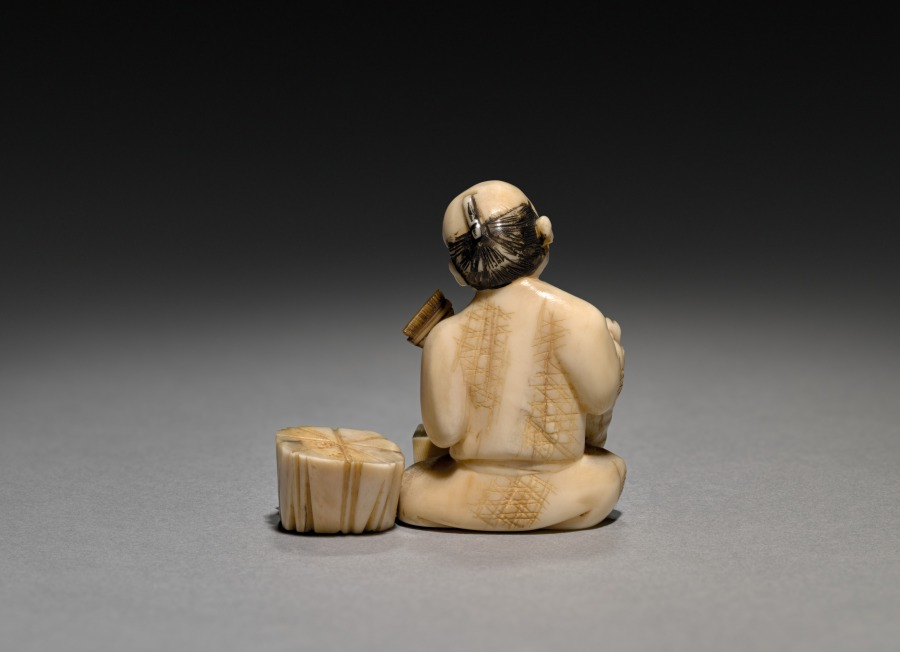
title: Man with Brush and Lantern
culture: Japan, Meiji period (1868–1912)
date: early 1900s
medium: ivory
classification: Ivory